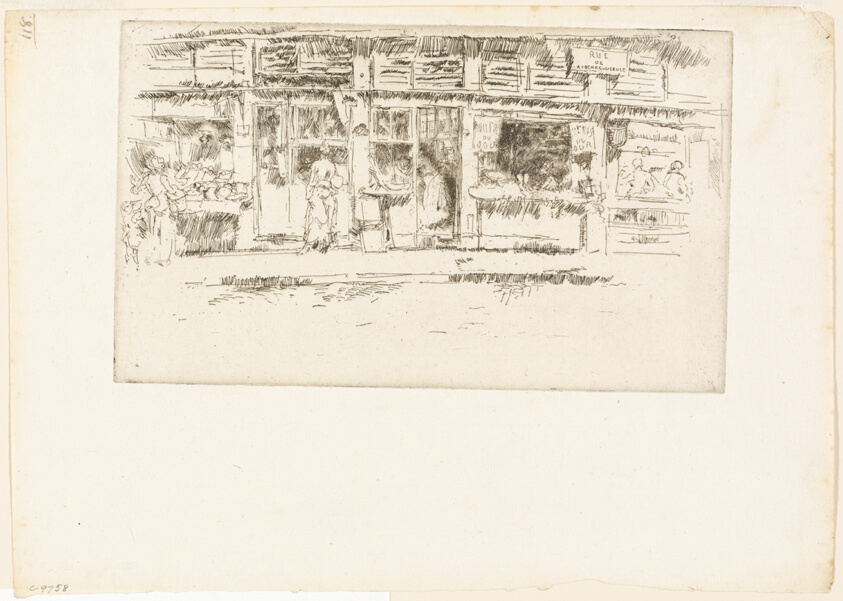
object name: Print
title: Rue de la Rochefoucault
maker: James McNeill Whistler (American, 1834-1903)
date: 1888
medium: Etching and drypoint with foul biting in black ink on ivory laid paper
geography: United States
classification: etching; foul biting; print; prints and drawing; paper; drypoint